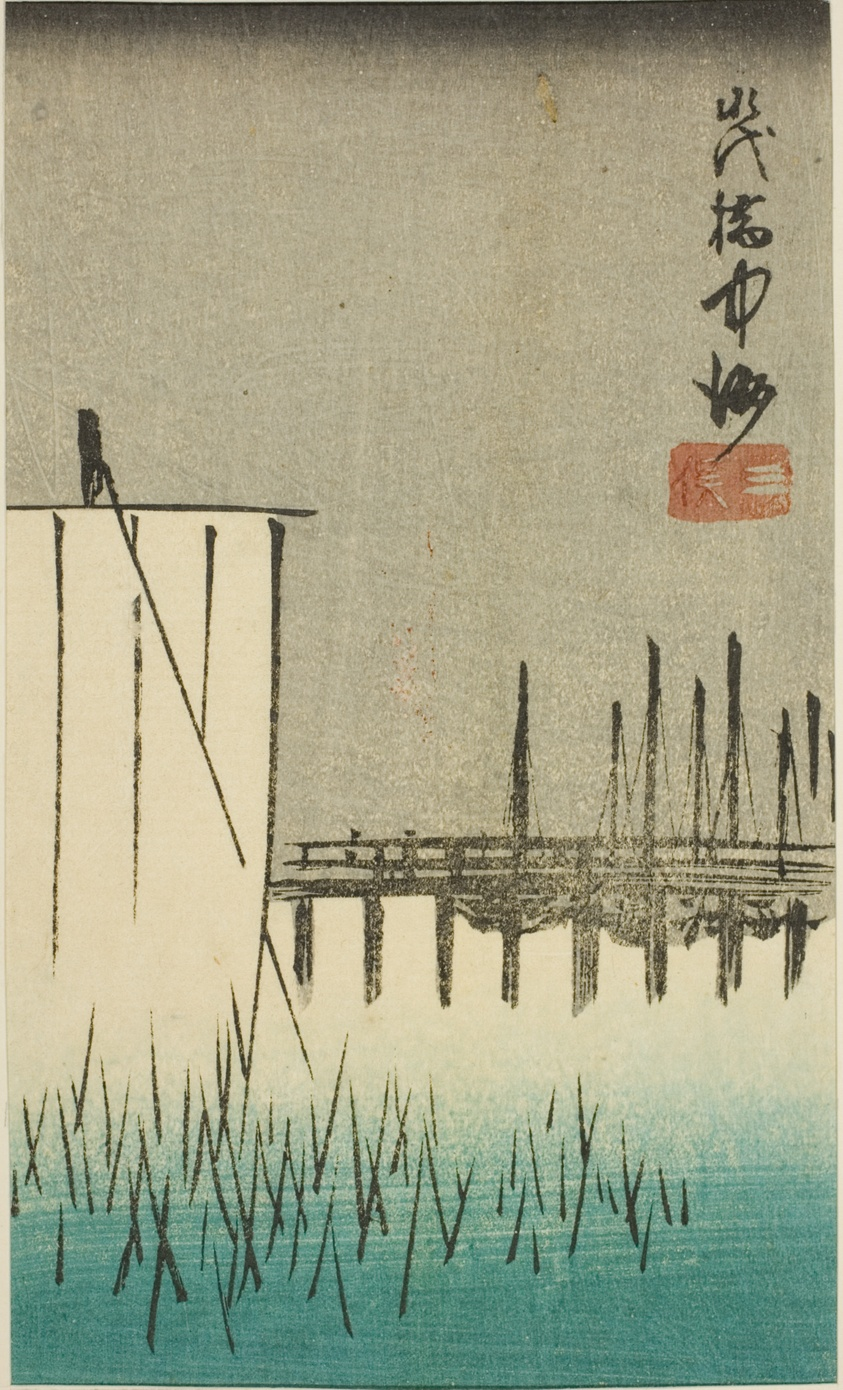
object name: Print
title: Eitai Bridge, Nakasu, and Mitsumata (Eitaibashi Nakasu Mitsumata), section of a sheet from the series "Cutouts of Famous Places in Edo (Harimaze Koto meisho)"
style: Japanese (culture or style)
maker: Utagawa Hiroshige 歌川 広重; Japanese, 1797-1858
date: 1852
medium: Color woodblock print; section of harimaze sheet (uncut sheet: 1939.1288)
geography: Japan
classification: woodblock print; print; asian art